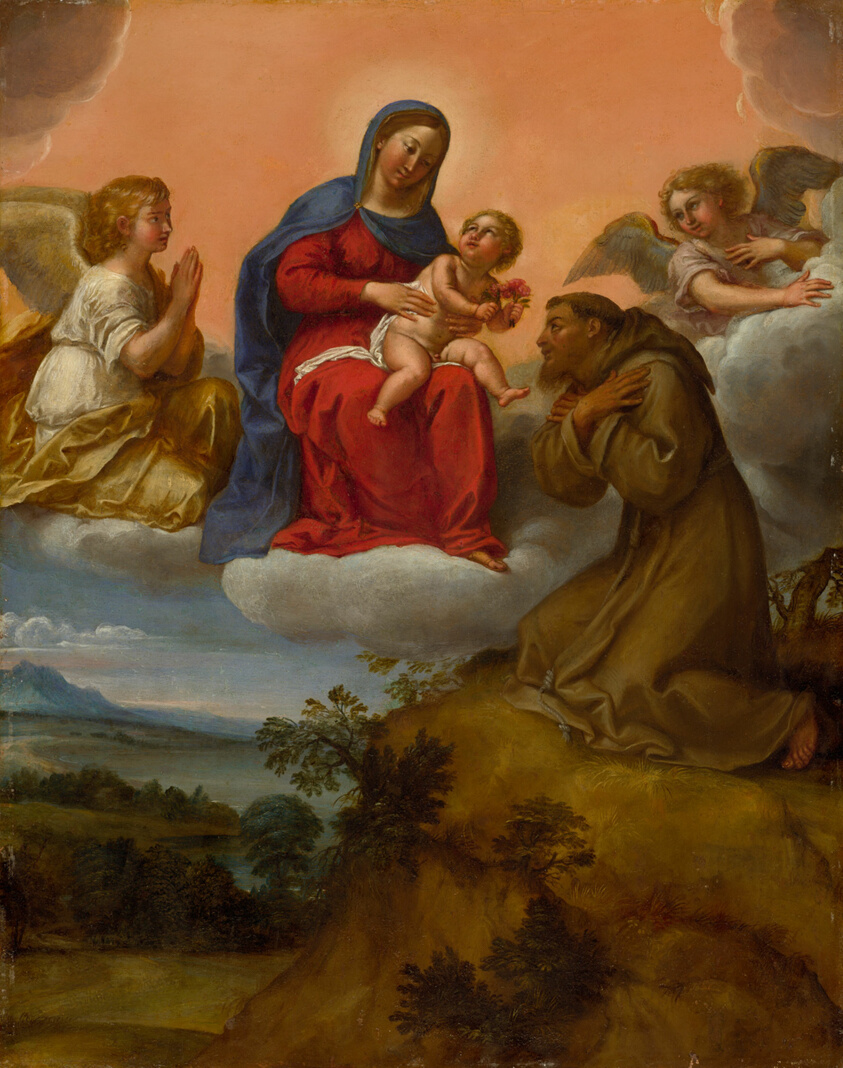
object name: Painting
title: Virgin and Child Adored by Saint Francis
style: 17th Century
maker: Francesco Albani (Italian, 1578-1660)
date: c. 1606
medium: Oil on copper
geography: Italy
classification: oil on copper; painting; european painting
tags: Virgin and child/Madonna and child, biblical, religion, religious figures, religious scenes, saints, Christian subjects, Christianity